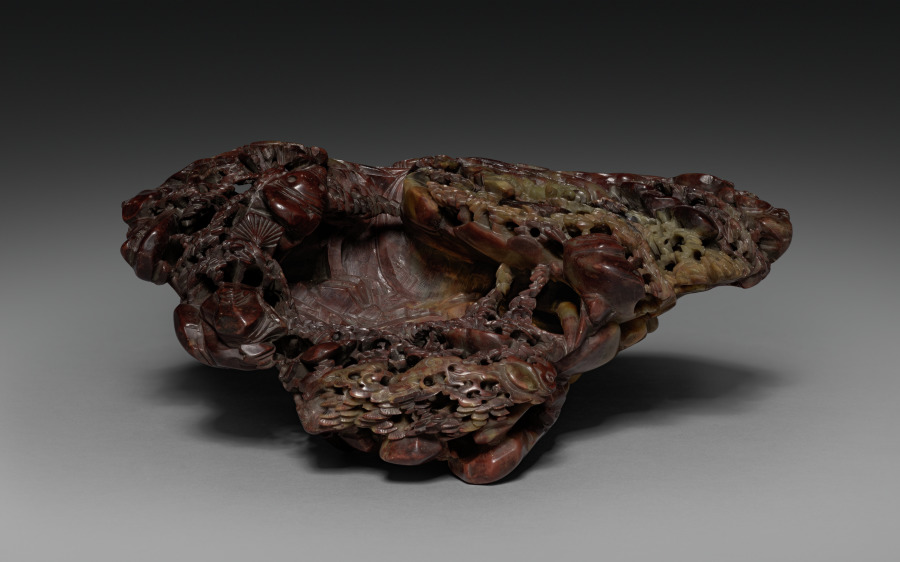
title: Landscape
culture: China, Qing dynasty (1644-1911)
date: 1644–1911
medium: soapstone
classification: Stone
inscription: 石門洞天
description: A mountain scenery surrounded by water and fish is meticulously carved out of soapstone, with a pond, bridge, waterfall, and temple front in its center. The unidentified figure scene on the left includes an ox and a man wearing what appears to be a Korean hat. A Buddha figure hidden in the depth of the temple can be glimpsed from the backside. The inscribed pillar on the right reads “Stonegate Cave to Heaven (shimen dongtian)”. Indentations all over the stone suggest that the miniature mountain was once adorned with precious stones and metal, presumably representing an earthly paradise to which one could escape in one’s mind and imagination.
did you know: A waterfall plummets down the cliff by the temple and then flows smoothly down to join the river at the front of the landscape scene.